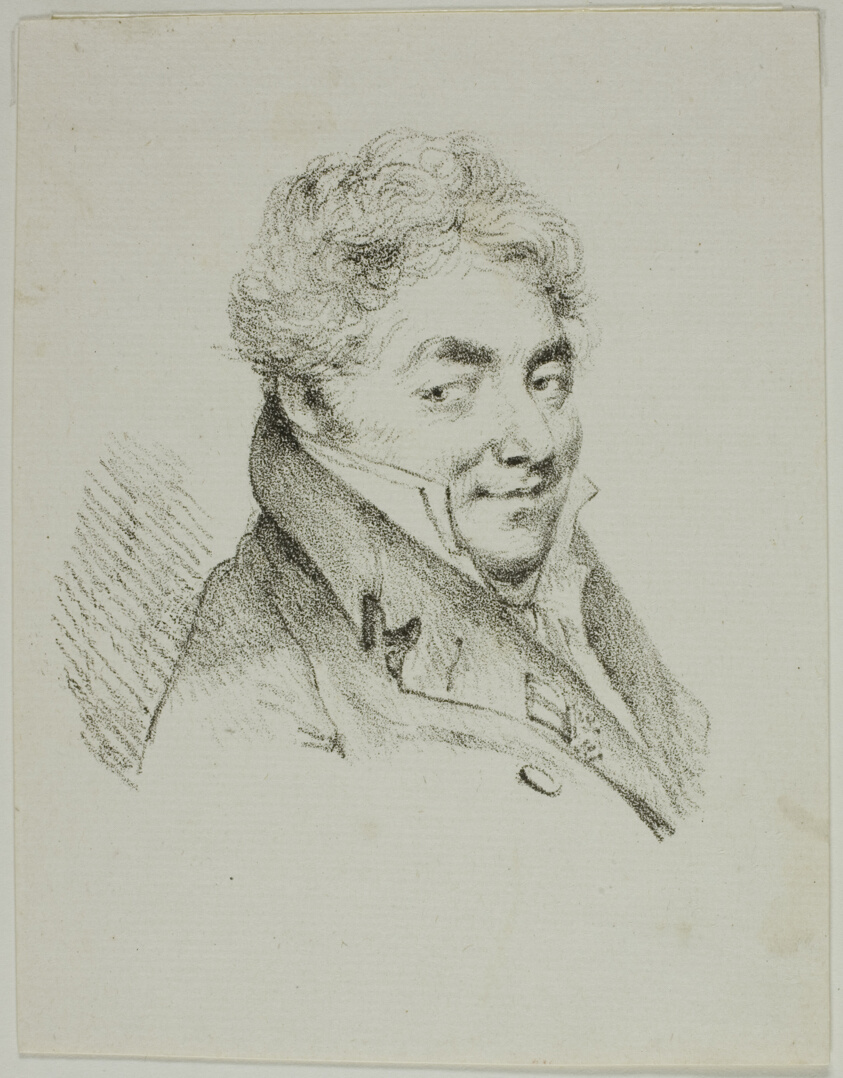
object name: Print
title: Portrait of General Frézia, Baron of Ogliano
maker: Dominique-Vivant Denon (French, 1747-1825)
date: 1817–20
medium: Lithograph in black on ivory laid paper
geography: France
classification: lithograph; print; prints and drawing